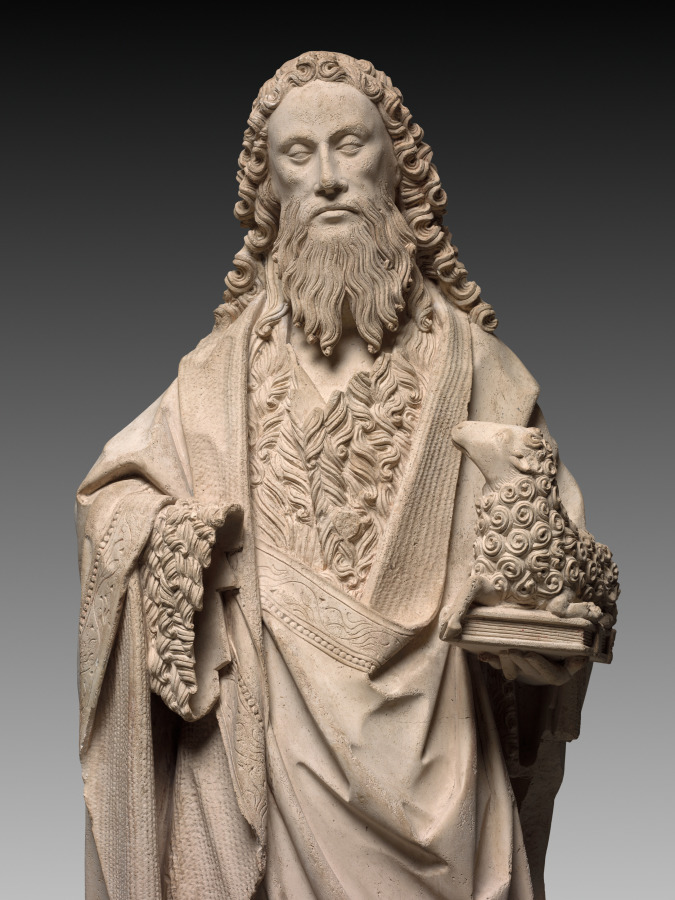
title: Saint John the Baptist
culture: French, Lorraine, Nancy or Bar-le-Duc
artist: attributed to Jan Crocq (Netherlandish, act. 1486–1510)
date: c. 1500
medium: Tonnerre limestone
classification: Sculpture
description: John the Baptist was one of the most beloved and widely venerated saints of the Middle Ages. He is depicted here wearing his traditional camel hair fleece beneath a luxuriant outer mantle. The sculpture is attributed to Jan Crocq, a Netherlandish artist active at the court of René II, Duke of Lorraine at Nancy from 1486 to 1510, and noted for his naturalistic treatment of hair and costume.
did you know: St. John the Baptist holds a book and a lamb, referencing his description of Christ as "the lamb of God."